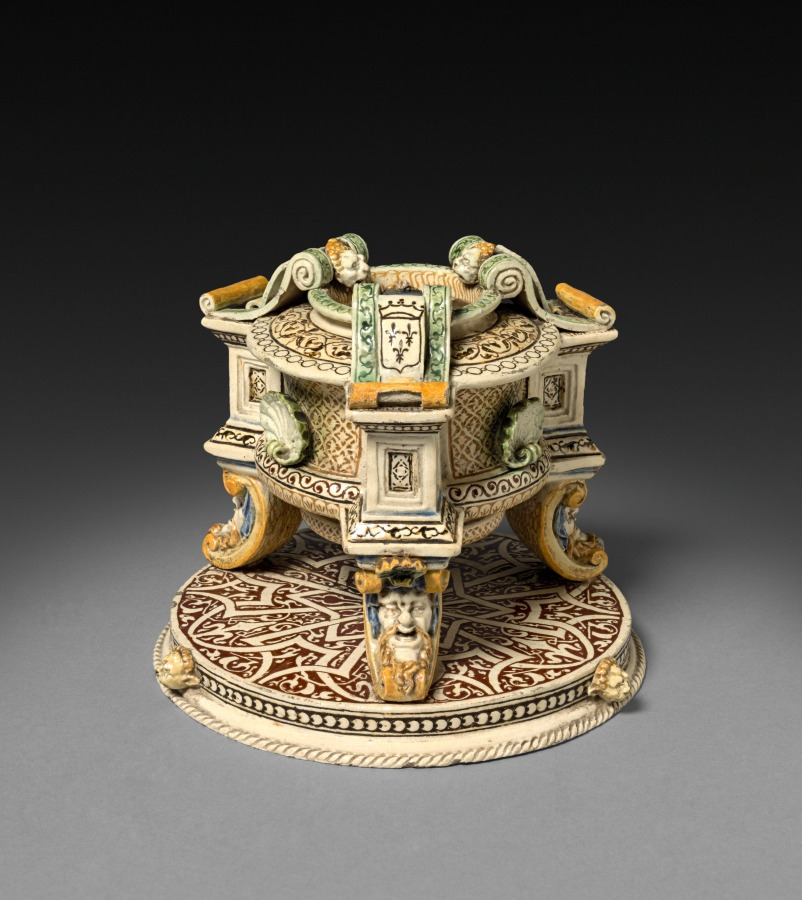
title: Salt Cellar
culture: France, 19th century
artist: after Saint-Porchaire (French)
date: 1800s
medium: white earthenware with inlaid decoration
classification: Ceramic